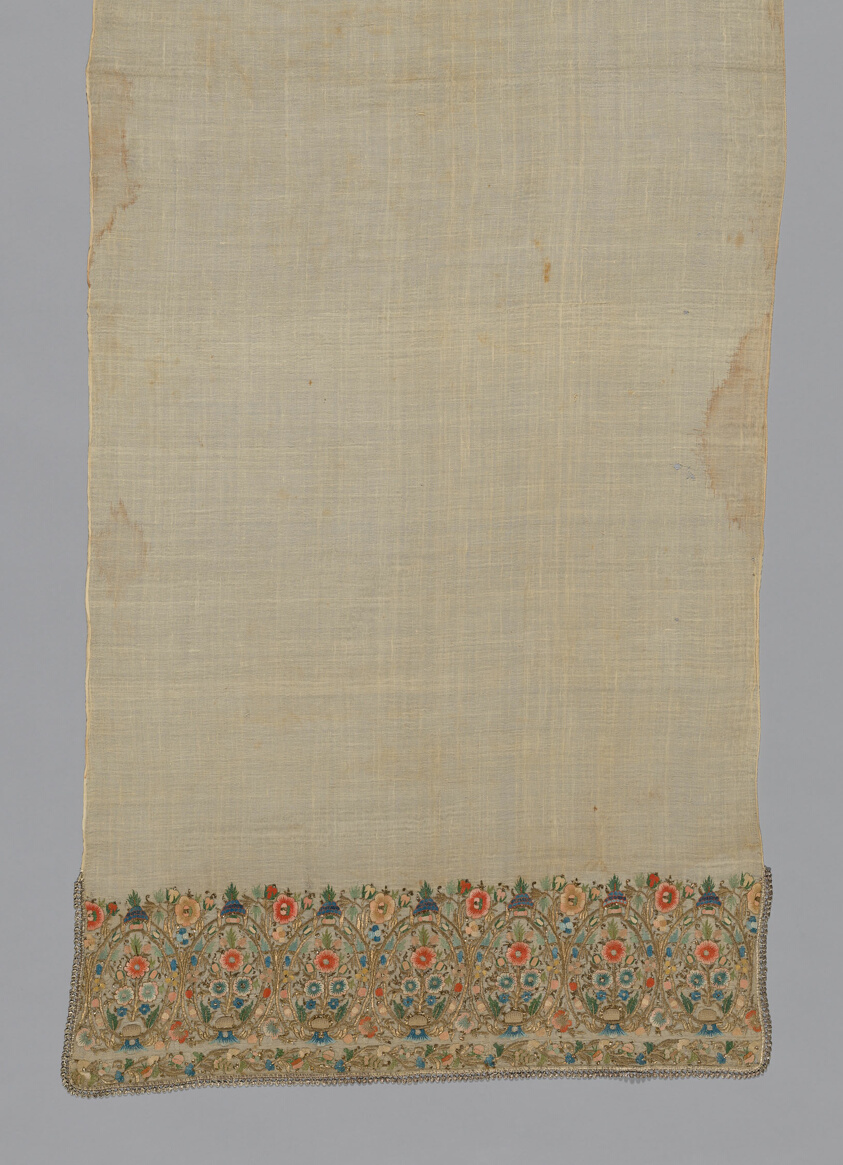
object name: Textile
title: Towel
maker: Turkey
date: 1840/1860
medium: Embroidered floral border designs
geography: Turkey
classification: textile; weaving; needlework (visual works)